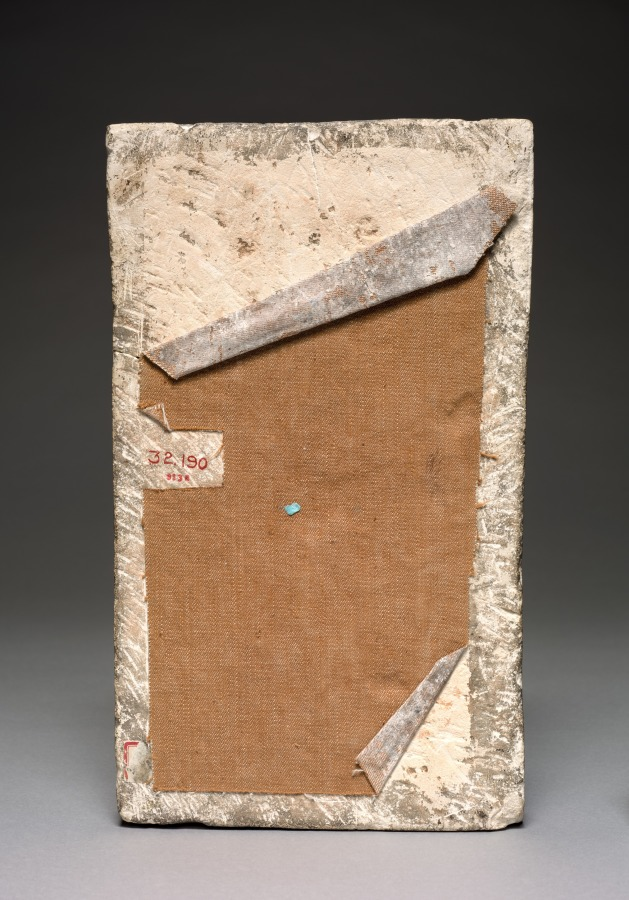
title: Stele of Hetpet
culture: Egypt, Middle Kingdom (2040–1648 BCE), Dynasty 12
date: 1980–1801 BCE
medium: limestone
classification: Sculpture